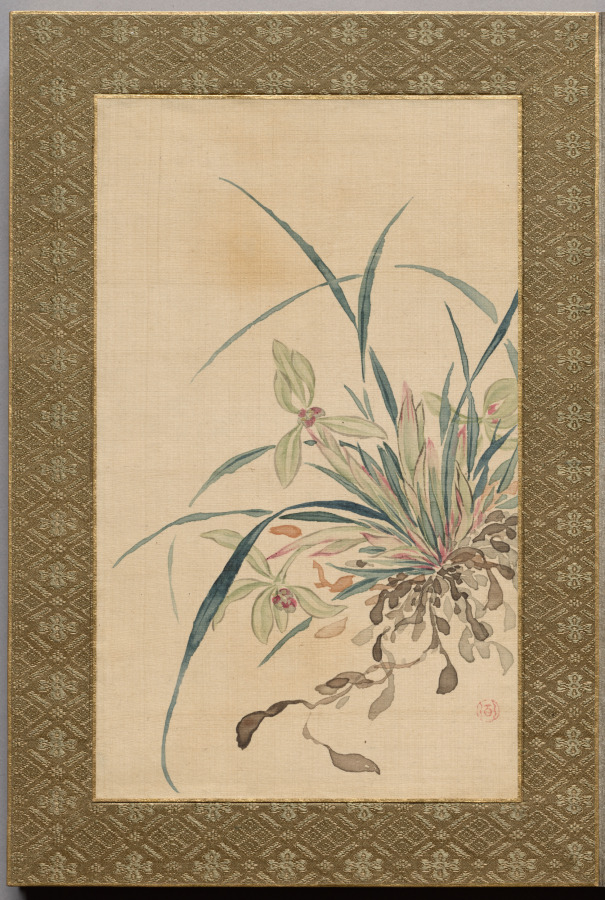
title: Painting from Flowers and Grasses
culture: Japan, Edo period (1615–1868)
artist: Tsubaki Chinzan (Japanese, 1801–1854)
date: 1841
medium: album; ink and color on silk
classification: Painting